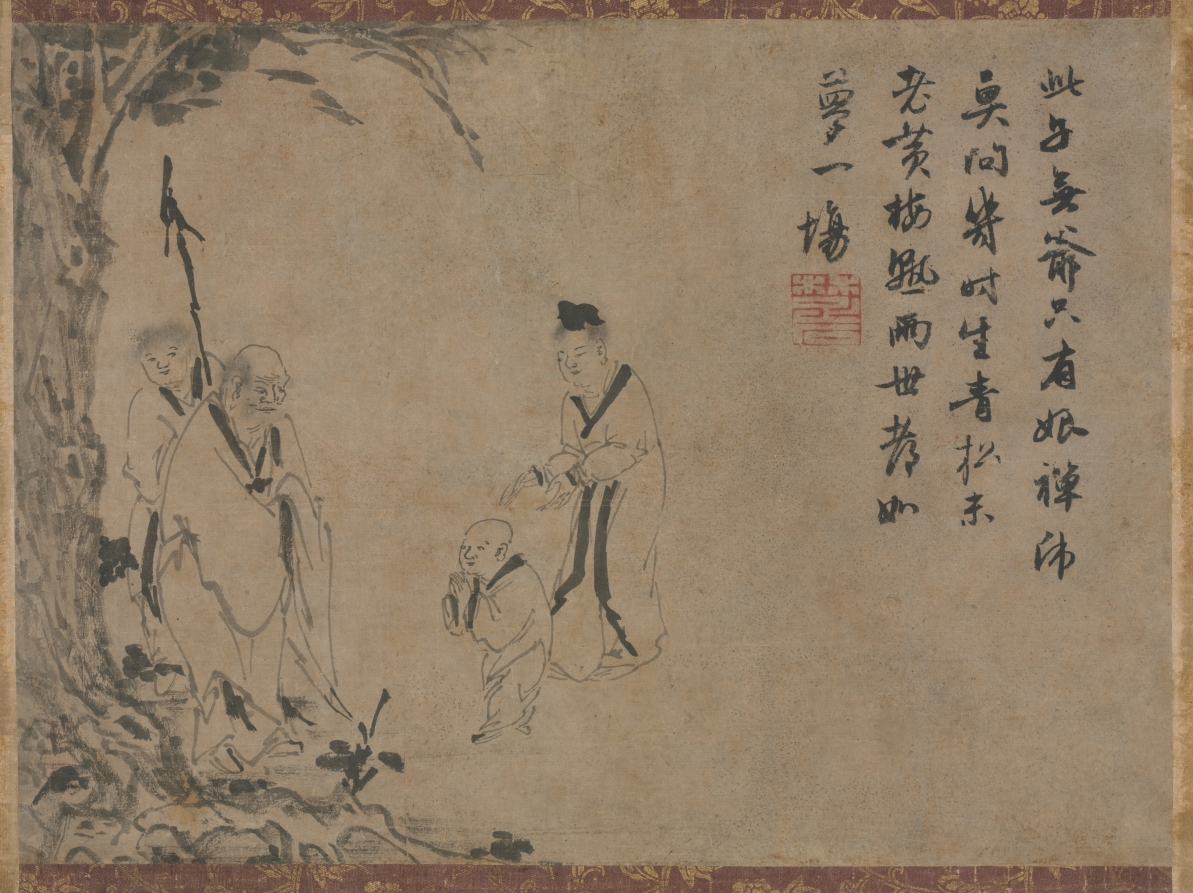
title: The Second Coming of the Fifth Patriarch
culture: China, Yuan dynasty (1271-1368)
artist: Yintuoluo (Chinese, c. 1285-c. 1355)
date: c. mid-1300s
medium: section of a handscroll mounted as a hanging scroll, ink on paper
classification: Painting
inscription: [印] 人言洞裡桃花源，未必人間有此枝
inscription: 此子無爺只有娘，禪師莫問幾時生。 青松未老黃梅飄，兩世都如夢一場。 [印] 楚石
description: A small boy, accompanied by his mother, is closing his hands in greeting to an old monk who has a young attendant standing behind him. Scholars believe the scene is a meeting between the fourth patriarch of Chan Buddhism, Daoxin 道信, and the little boy, who was the reincarnation of an old monk named Zaisong daozhe 栽松道者 (Pine Planter). They had encountered before, during which Daoxin advised the Pine Planter to endure a reincarnation as he was too old to reach enlightenment. This painting is done by Yintuoluo, an artist renowned for his simple and unadorned style.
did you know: This painting is just a section of a handscroll that has been remounted as a hanging scroll.